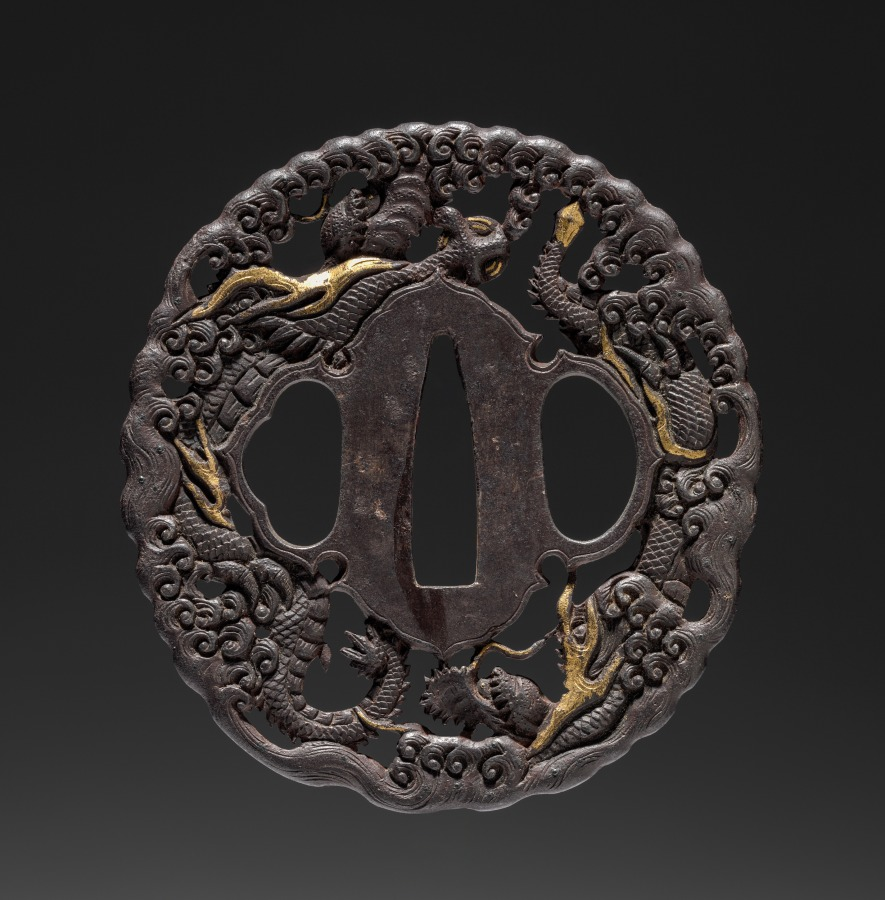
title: Sword Guard (Tsuba) with Dragons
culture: Japan, possibly Edo period (1615-1868)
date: c. 1615–1868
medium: iron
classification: Arms and Armor